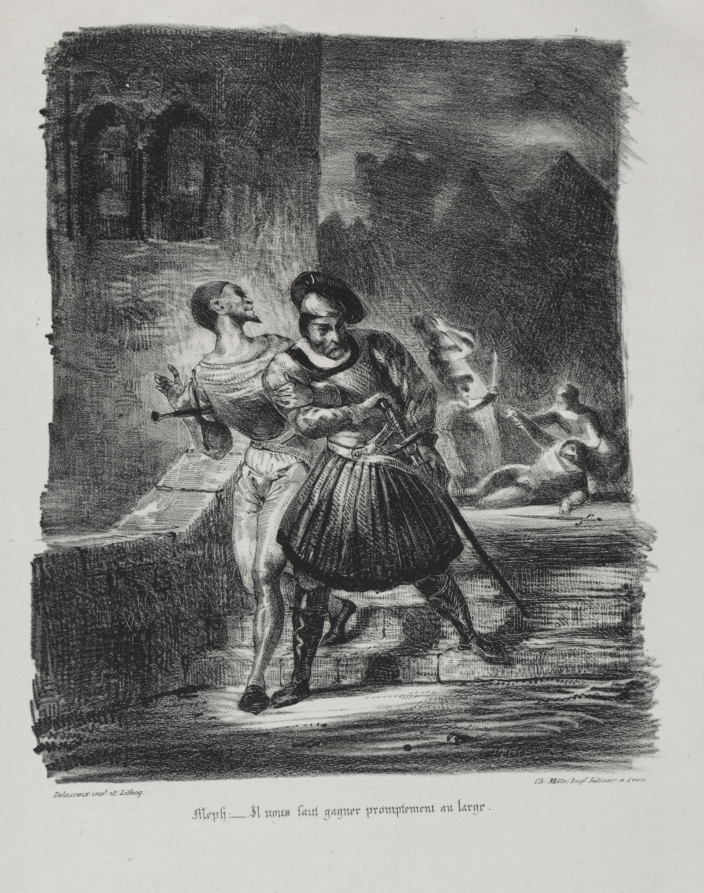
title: Illustrations for Faust: Méphistophélés and Faust flee after the duel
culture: France, 19th century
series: Faust: Tragédie de M. de Goethe, translated into French by Albert Stapfer.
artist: Eugène Delacroix (French, 1798–1863)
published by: Chez Ch. Motte, Éditeur, distributed by Chez Sautelet, Libraire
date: 1828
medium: lithograph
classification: Print